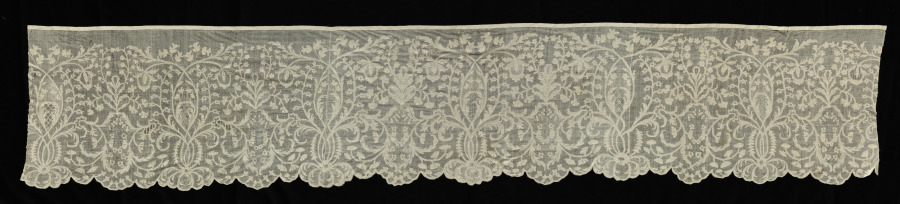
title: Lace Flounce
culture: Unassigned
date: 1700s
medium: Linen: needle lace (drawnwork) and embroidery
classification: Lace